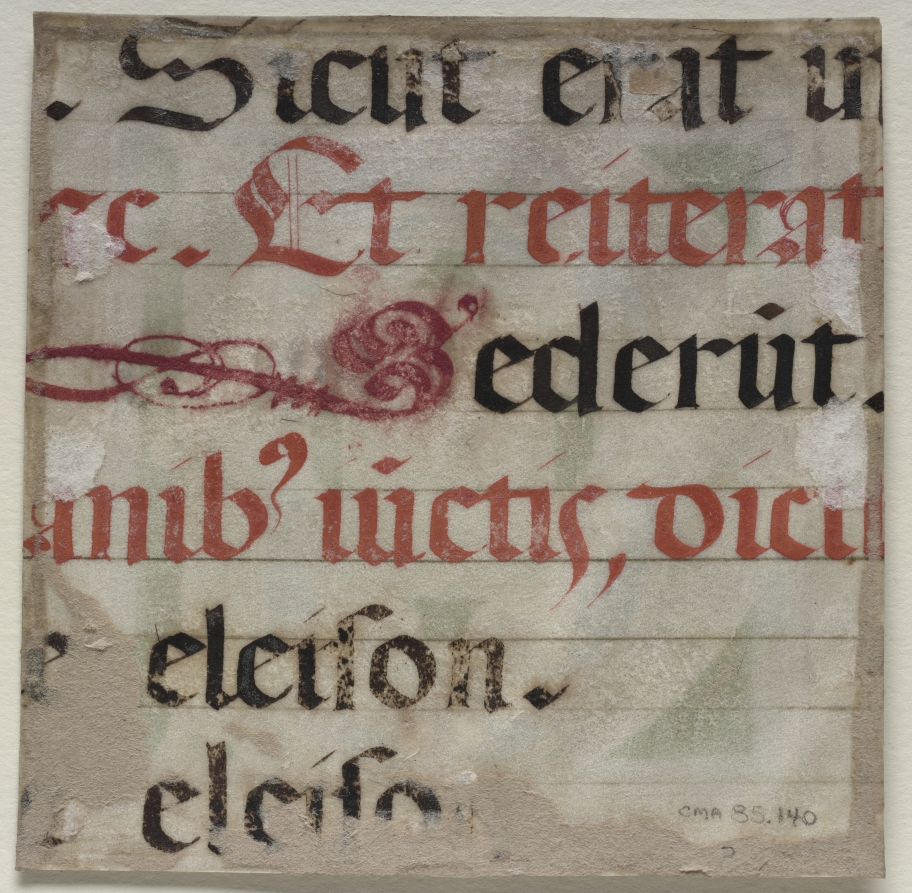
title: Historiated Initial (E) Excised from the Colonna Missal: The Martyrdom of Saint Stephen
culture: Italy, Rome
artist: Apollonio de' Bonfratelli (Italian)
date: c. 1532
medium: ink, tempera, and liquid gold on vellum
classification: Manuscript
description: This initial was once part of a manuscript missal (a service book for the altar) made for Cardinal Pompeo Colonna, probably in the year of his death. The letter E is decorated with gold arabesque and rope-work patterns evocative of Renaissance goldsmithing. At the center is a small pen-and-ink drawing representing the death of Saint Stephen, the Christian Church's first martyr. The text introduced by this initial comes from the Offertory of the Mass for the Feast of Saint Stephen (December 26), and would have read, Elegerunt Apostoli Stephanum (And they chose Stephen, a man full of faith, and the Holy Ghost). The illuminator, Apollonio de' Bonfratelli, was active at the papal court where he decorated manuscripts for Popes Pius IV and V as well as other members of the Church hieiarchy.